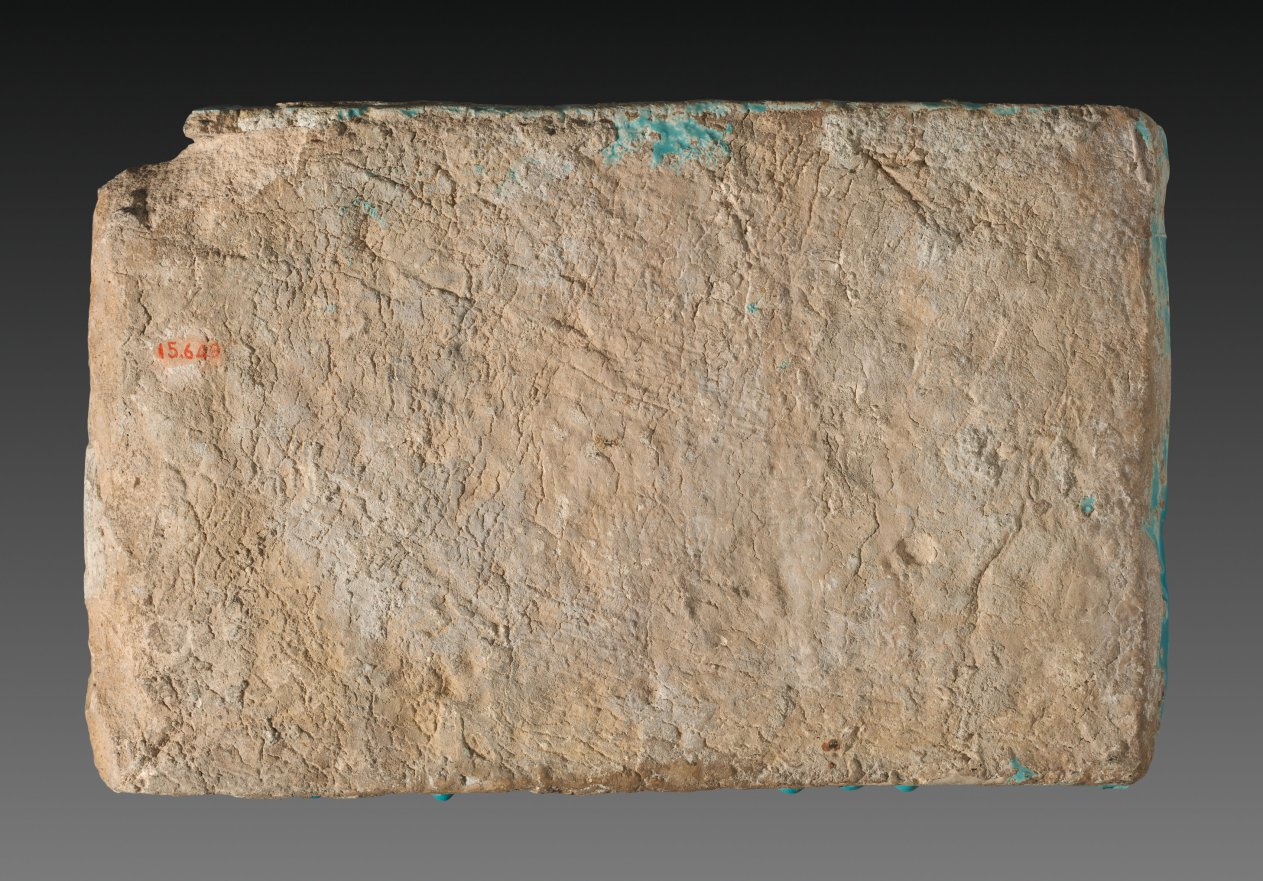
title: Wall Tile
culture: Iran, Ilkhanid period (1256–1353)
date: 1300s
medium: fritware with luster-painted design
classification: Ceramic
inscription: Naskhi inscription